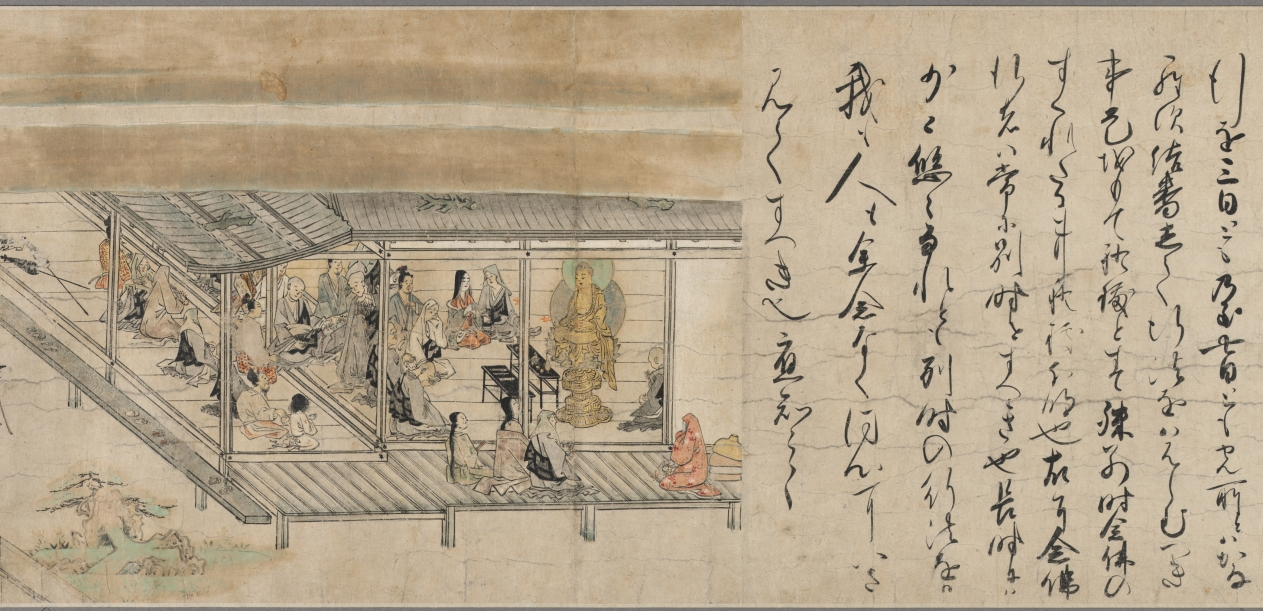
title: The Illustrated Miraculous Origins of the Yūzū Nenbutsu School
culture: Japan, Kamakura period (1185–1333)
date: early 1300s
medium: Handscroll; ink, color, and gold on paper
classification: Painting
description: This painting is the second of a set of two illustrated handscrolls. The first scroll depicts the biography of the Japanese Buddhist monk Ryōnin. This scroll begins with scenes of Ryōnin’s death and relates episodes illustrating the efficacy of following his teachings. Ryōnin asserted the total interconnectedness of all things and the spiritual benefit of chanting the name of the Buddha Amida for one another.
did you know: The other scroll from this two-scroll set belongs to the Art Institute of Chicago.